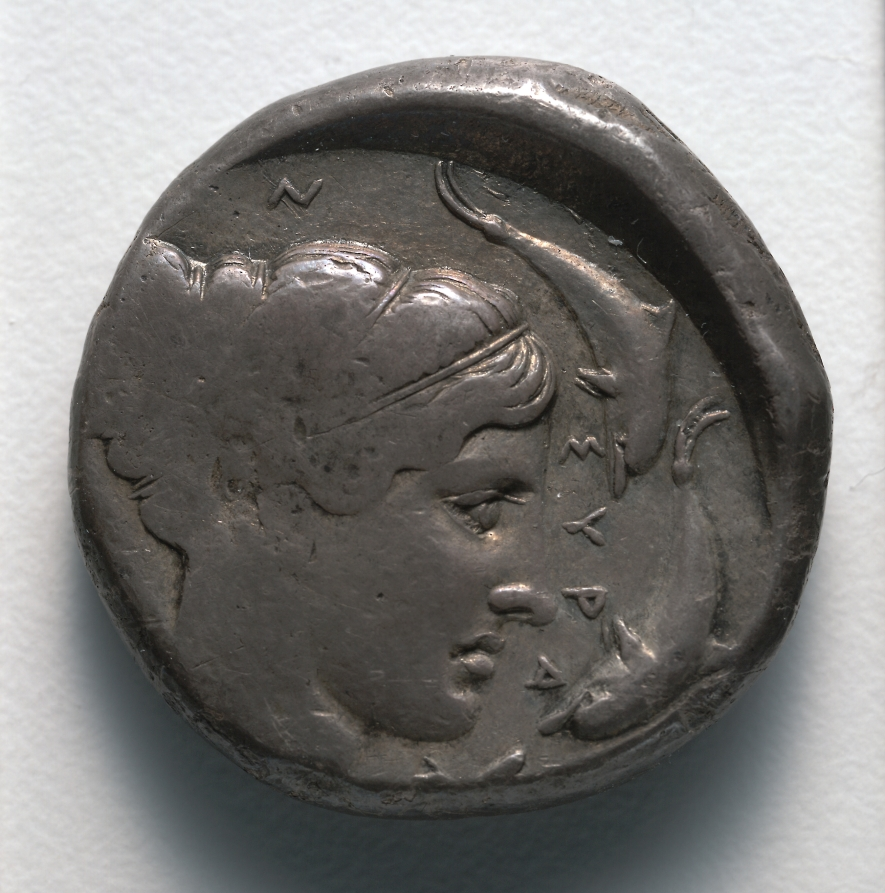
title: Tetradrachm: Head of Arethousa (reverse)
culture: Greek, minted at Syracuse (Sicily)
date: c. 430–420 BCE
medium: silver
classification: Coins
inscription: ΣΥΡΑΚ[ΟΣΙΟ]Ν